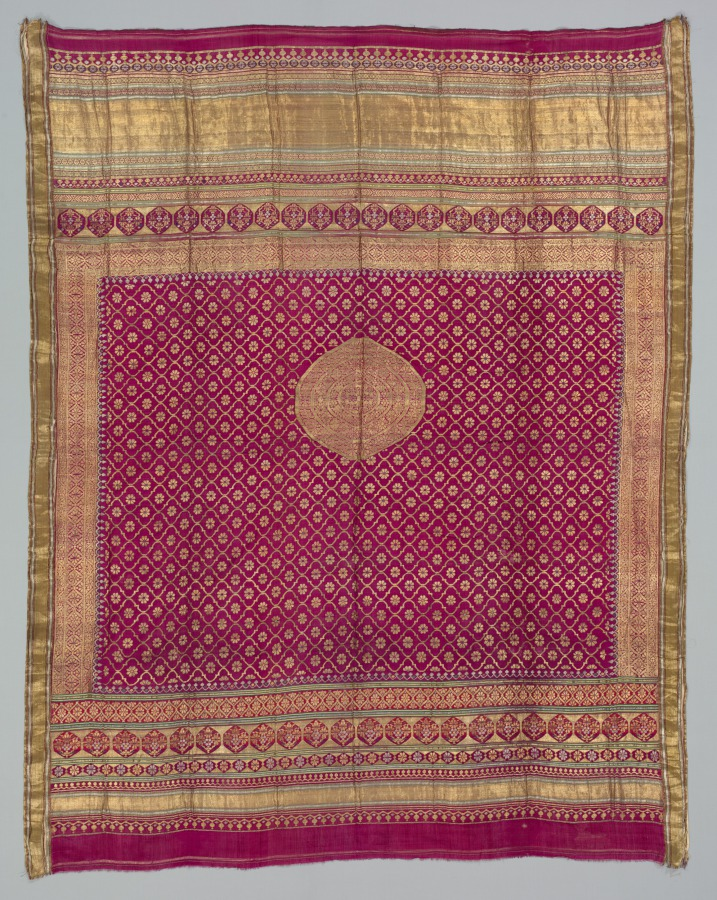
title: Fragment of Gold Cloth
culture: India, 19th century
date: 1800s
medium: brocade; silk, gold and silver threads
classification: Textile